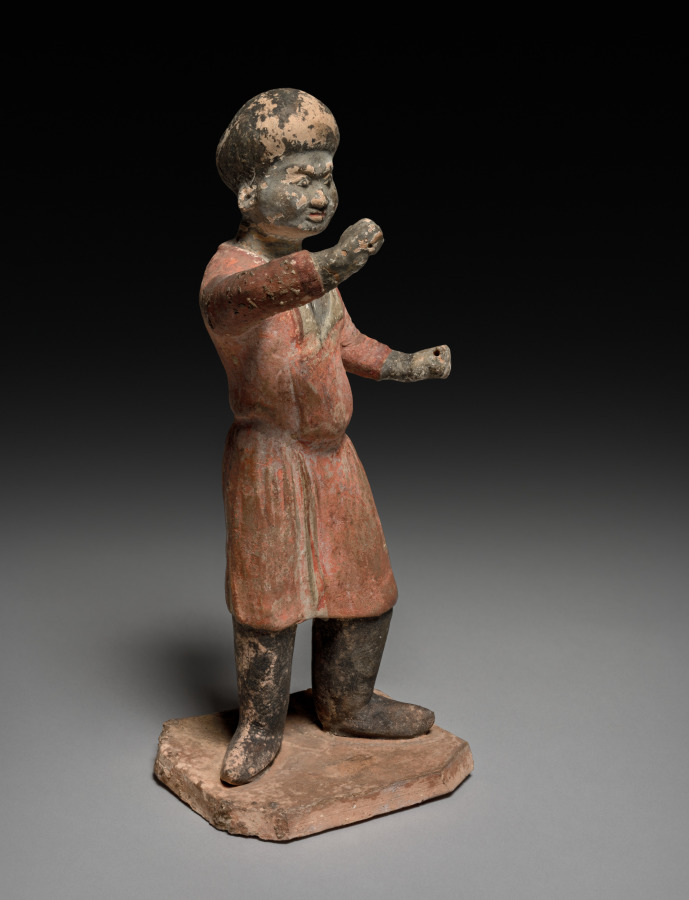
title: Groom (Tomb Figure)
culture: China, Sui dynasty (581-618) - Tang dynasty (618-907)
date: late 500s–early 600s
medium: buff earthenware with polychromy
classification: Sculpture